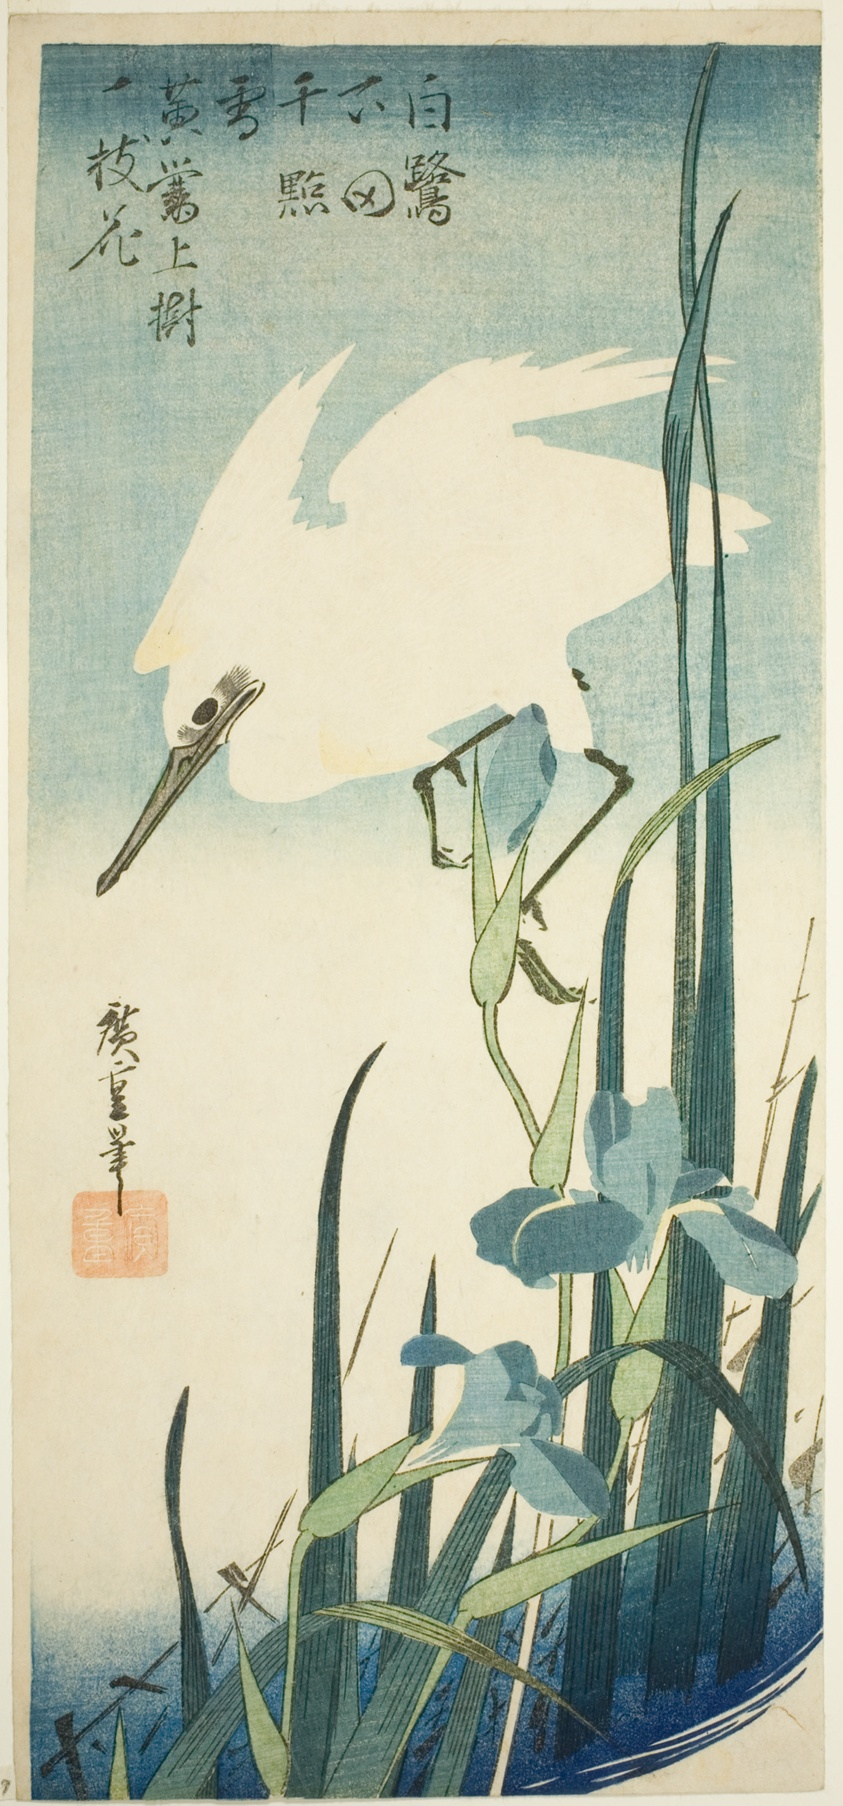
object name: Print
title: White heron and iris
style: Japanese (culture or style)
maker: Utagawa Hiroshige 歌川 広重; Japanese, 1797-1858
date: c. 1832/34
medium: Color woodblock print; otanzaku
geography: Japan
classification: woodblock print; print; asian art